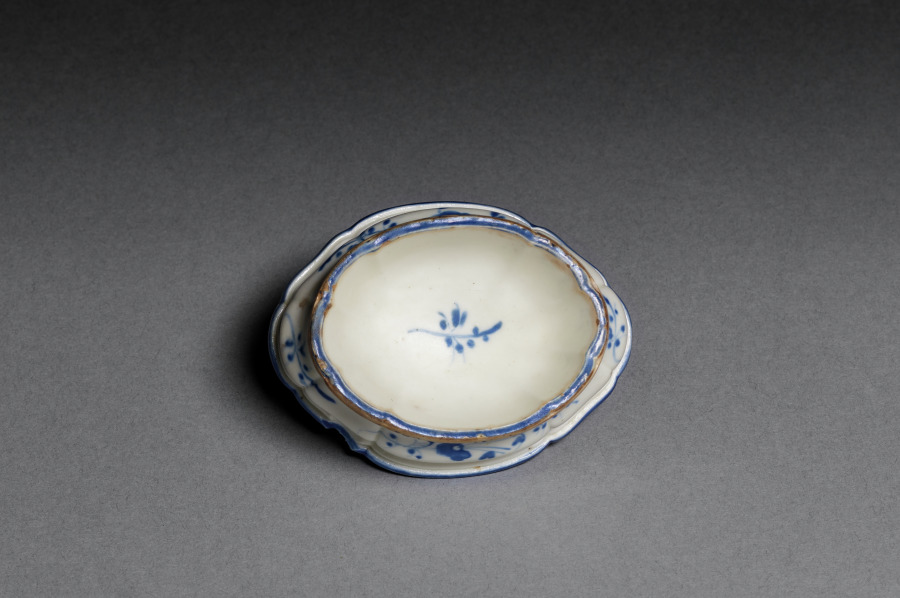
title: Salt Dish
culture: France, Orleans, 18th century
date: c. 1775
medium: soft-paste porcelain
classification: Ceramic